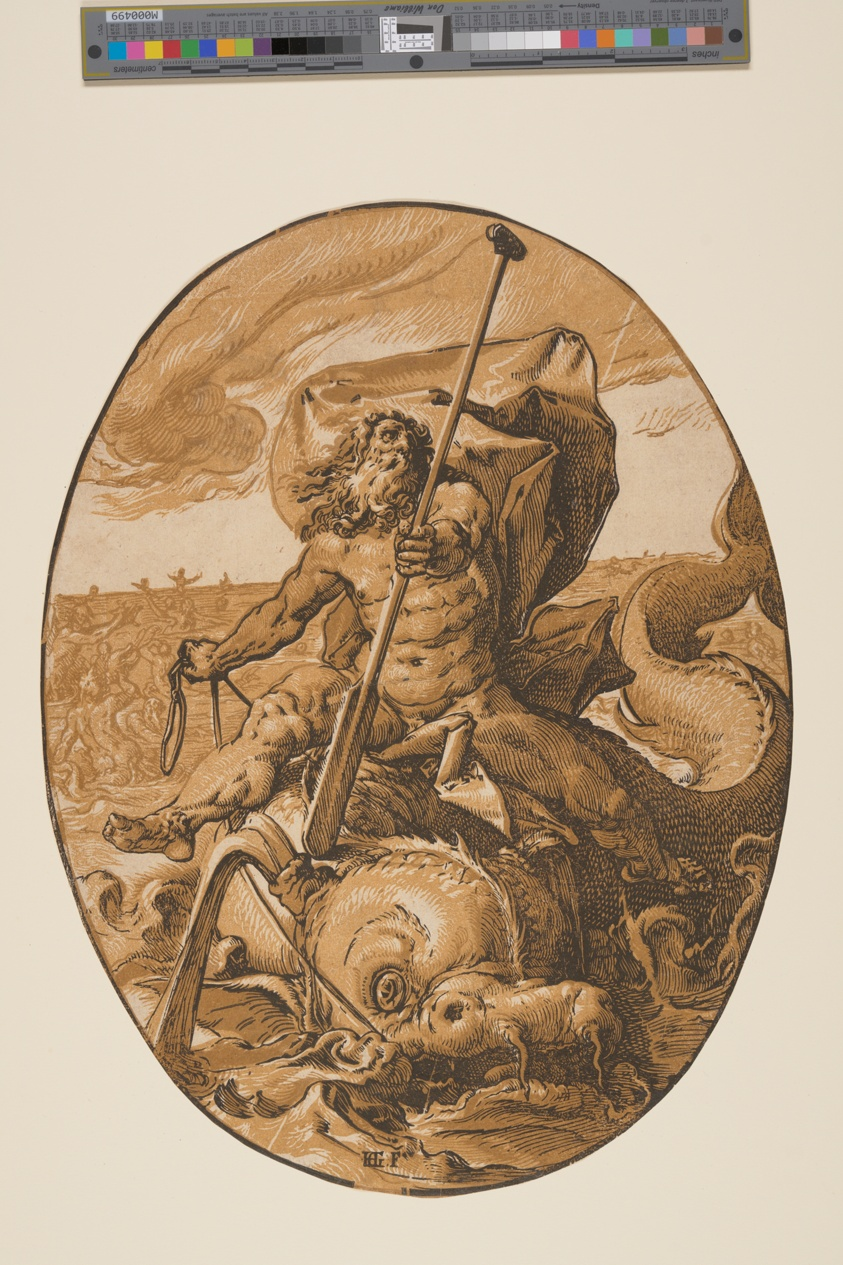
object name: Print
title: Oceanus, from The Deities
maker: Hendrick Goltzius (Dutch, 1558–1617)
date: 1588/90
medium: Chiaroscuro woodcut from three blocks in tan and ochre on ivory laid paper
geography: Netherlands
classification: print; paper; prints and drawing; woodcut